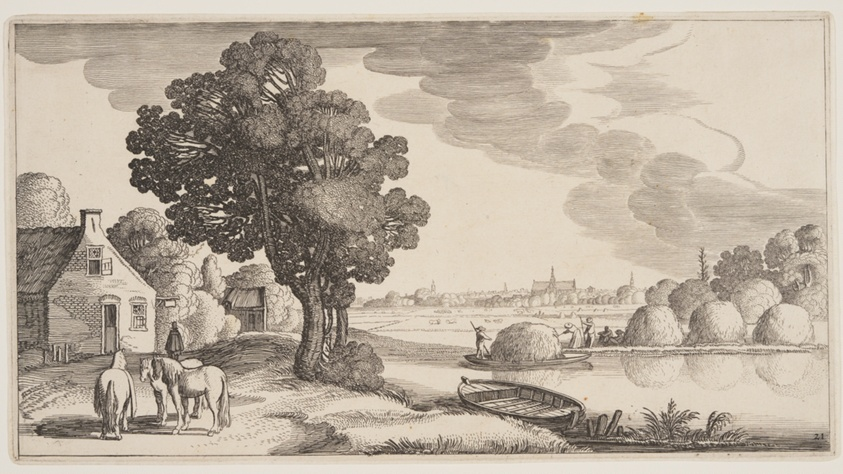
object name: Print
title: Transport of Hay on a River, from Landscapes (Playsante Lantschappen)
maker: Attributed to Claes Jansz. Visscher II (Dutch, 1586-1652); after Jan van de Velde II (Dutch, c. 1593-1641)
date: c. 1641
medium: Etching, with engraving, on ivory laid paper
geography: Netherlands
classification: etching; paper; print; prints and drawing